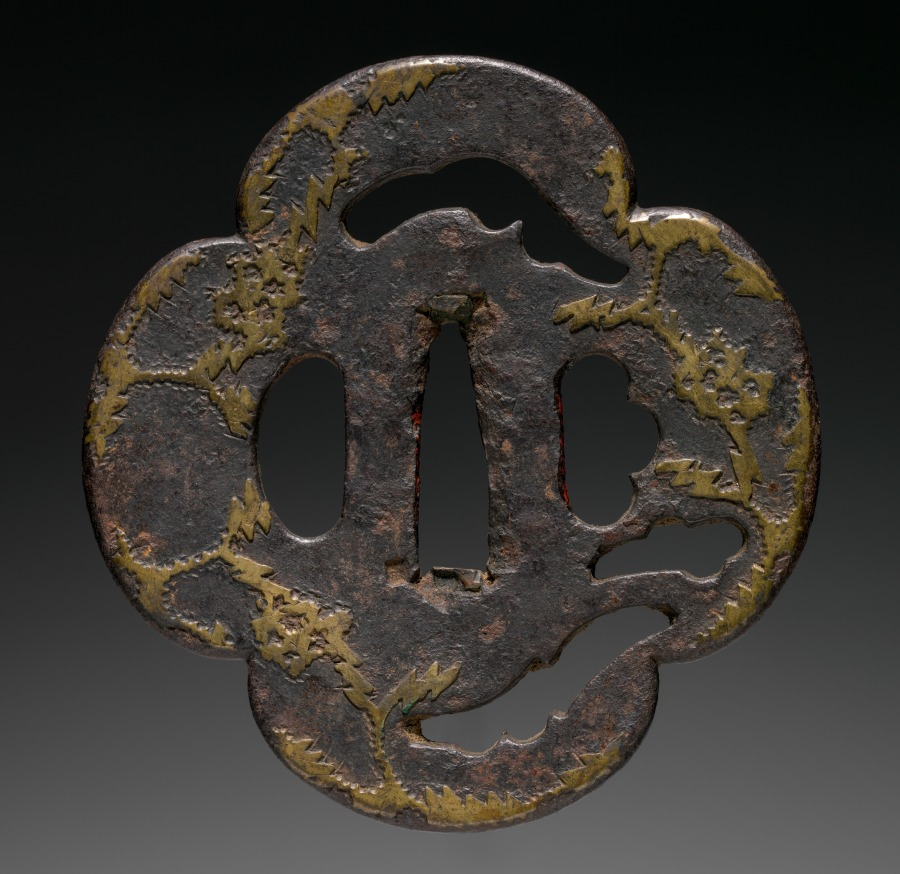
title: Sword Guard (Tsuba)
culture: Japan, possibly Edo period (1615-1868)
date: c. 1615–1868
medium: iron with brass inlay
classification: Arms and Armor